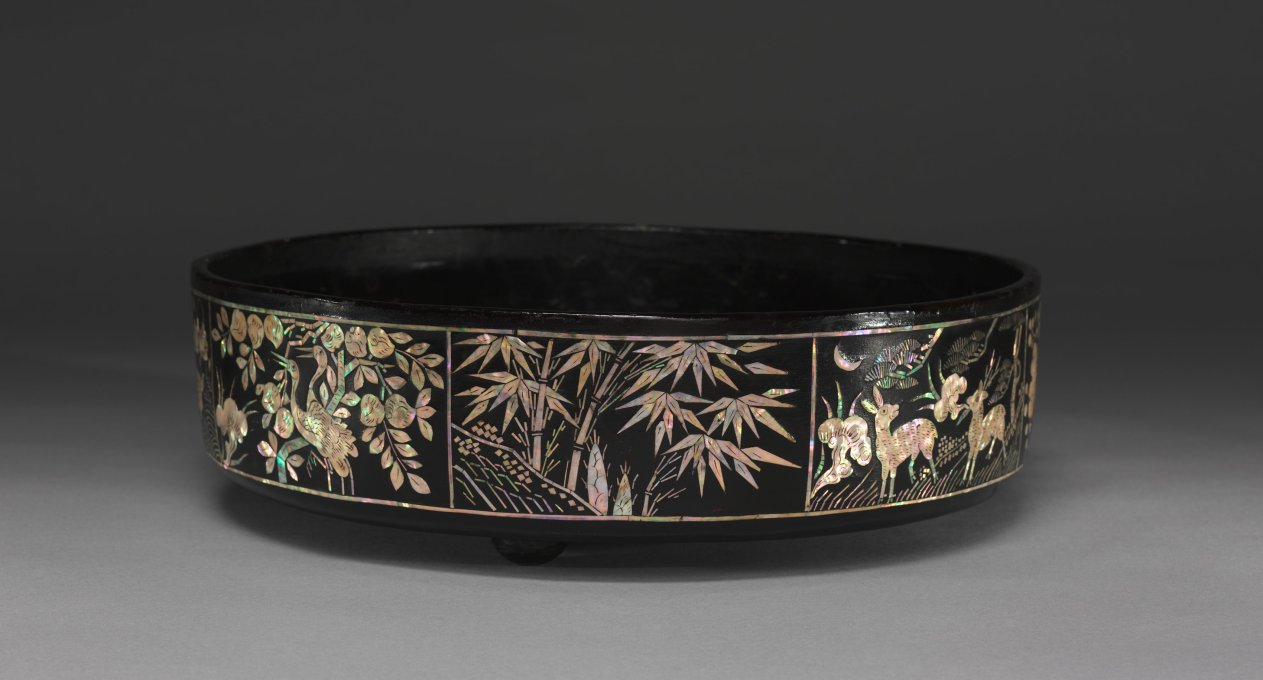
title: Tray for Sewing Tools with Mother-of-Pearl Inlay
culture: Korea, Joseon dynasty (1392–1910)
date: 1800s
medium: lacquer with mother-of-pearl inlay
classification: Lacquer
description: This mother-of-pearl lacquer tray is decorated with various scenes of animals interacting with their natural surroundings. Its flat circular base depicts a pond where a leaping carp and a small school of fish swim below the boughs of a cherry tree. The tray’s exterior wall is densely decorated with various animals paired with plants symbolizing wishful thoughts of longevity, marital happiness, and prosperity.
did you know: Many thin layers of lacquer were applied to the tray's leather core. The design was cut into the dry lacquer and then the mother-of-pearl was inserted.